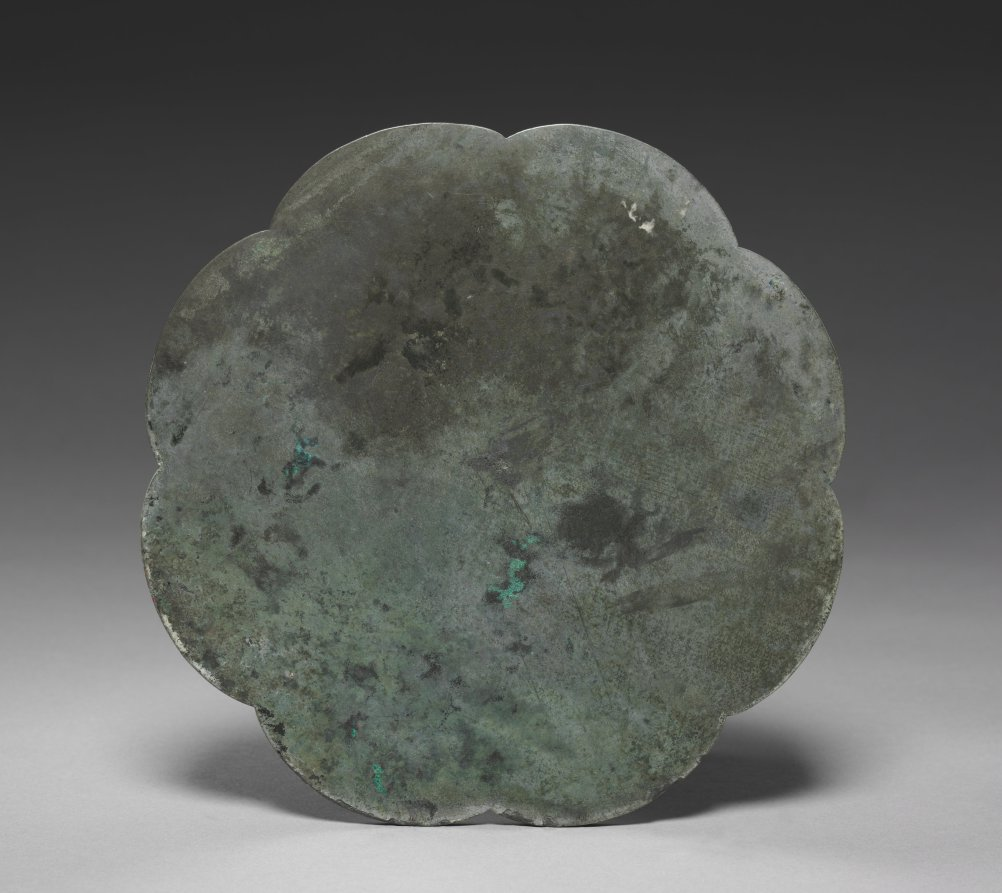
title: Flower-shaped Mirror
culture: Korea, Goryeo dynasty (918–1392)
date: 1100s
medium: bronze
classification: Metalwork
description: From ancient times, a mirror assumed various roles; a ritualistic tool, a diplomatic gift, and a luxury commodity. During the Goryeo dynasty (918-1392), which saw the great advancement of metallurgy, the royal court was the center of distributing sophisticated bronze artifacts. According to historical records, on the 7th day of the Lunar New Year, the king bestowed a bronze mirror inscribed with auspicious symbols upon each court official as part of a ceremony to celebrate the Day of Humans. This explains why a large quantity of bronze mirrors were excavated from elite tombs.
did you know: Due to its origin as an important tool in religion and politics, mirrors are often mentioned in many Korean proverbs that warn certain behaviors.